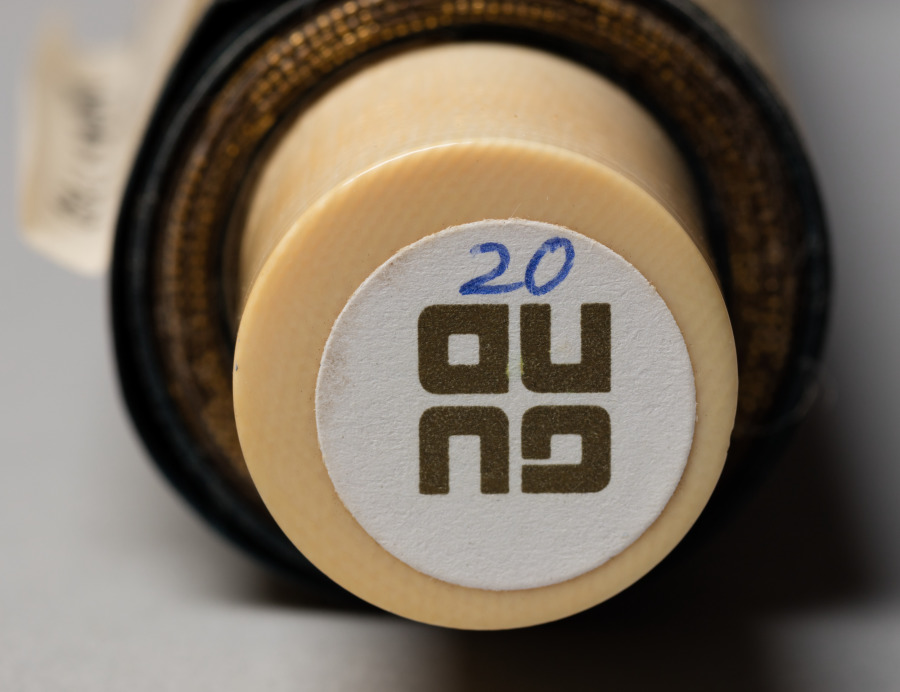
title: Sparrows and Bamboo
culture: Japan, Muromachi period (1392–1573)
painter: Shiken Saidō (Japanese, 1486–1581)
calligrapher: calligraphy by Ekkei Reikaku (Japanese, d. 1609)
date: mid- to late 1500s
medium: hanging scroll; ink on paper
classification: Painting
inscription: signed: Ekkei Reikaku daishi owaru inscription sealed: Reikaku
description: Shiken Saidō, whose style name was Ze'an, was a Zen monk who trained at Shōkokuji temple in Kyoto, and designed the garden of Reiun’in at Myōshinji temple. He painted landscapes in the style of painter and art advisor to the shogun, Sōami (died 1525), as well as bird-and-flower compositions. A poetic inscription by the monk Ekkei Reikaku accompanies this gentle composition of two sparrows perched on bamboo.